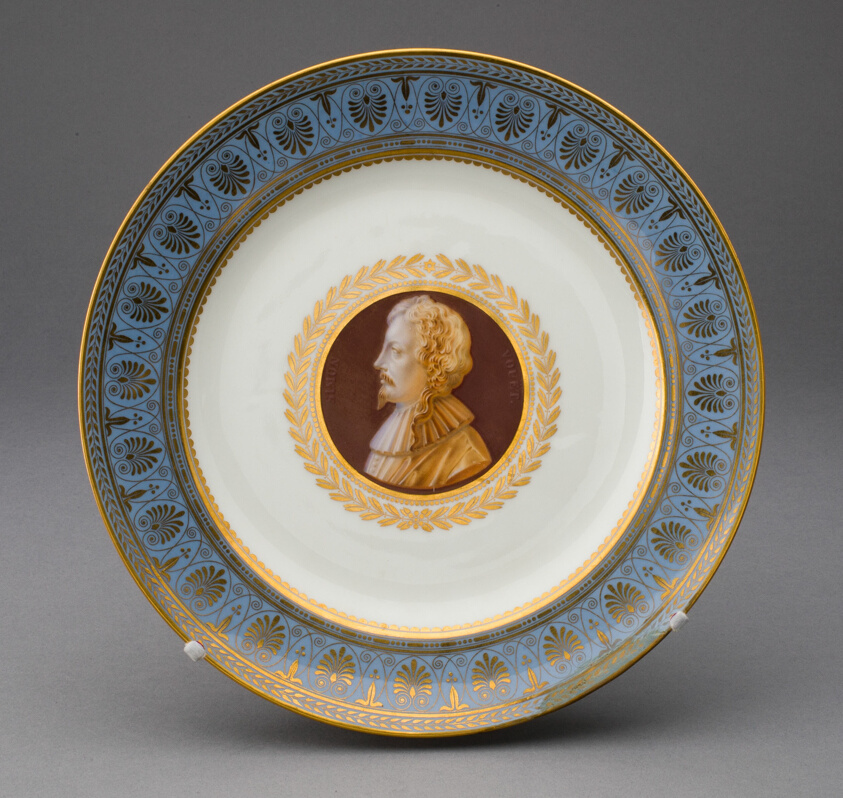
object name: Ceramics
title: Plate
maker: Sèvres Porcelain Manufactory; French, founded 1740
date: 1834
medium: Soft-paste porcelain, polychrome enamels, and gilding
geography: Sèvres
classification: plate (general, dish); dish (vessel); ceramics; european decorative arts; tableware